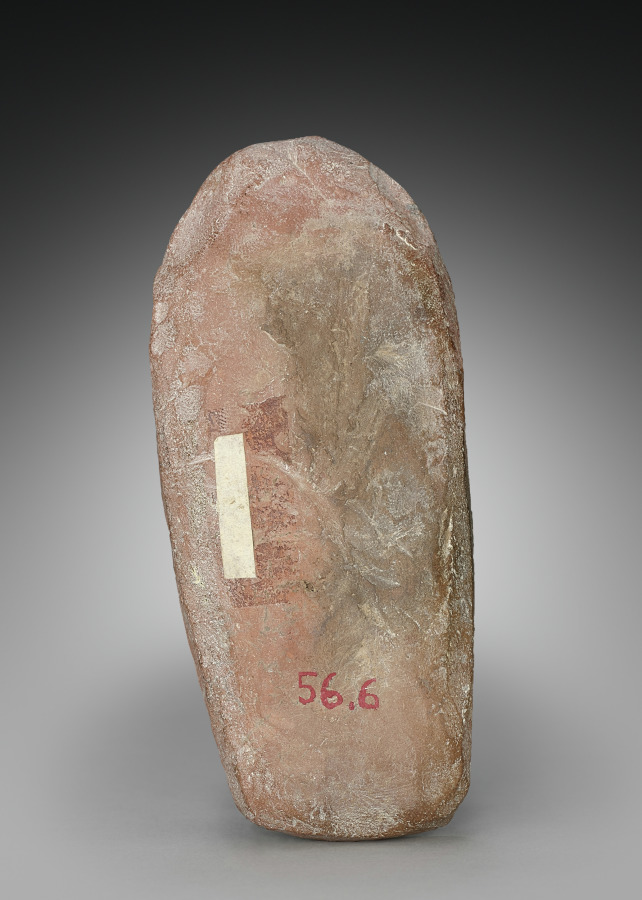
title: Mould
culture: India, Kashmir, 8th-9th Century (?)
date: 700s-800s(?)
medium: terracotta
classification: Ceramic